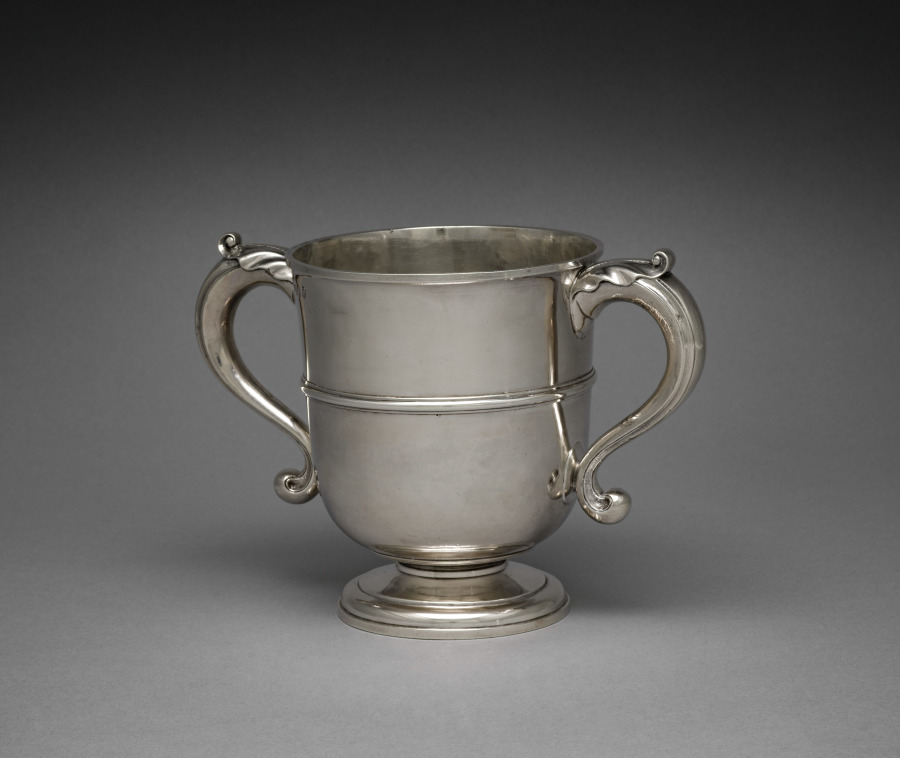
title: Two-Handled Cup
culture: England, London, 18th century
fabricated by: Anthony Nelme (British)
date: 1712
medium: silver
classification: Silver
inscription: engraved: coat of arms of Irvine of Bonshaw imaling O'Bryen.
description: Nelme was one of the most famous and successful native English silversmiths of a time when Huguenots (French Protestants) dominated the creation of richly decorated pieces for the most fashionable market.